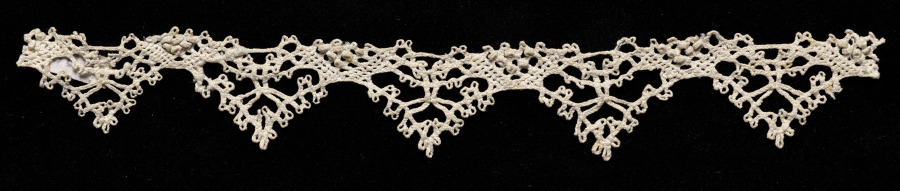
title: Lace Edging of Points (no selvage)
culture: Italy, Venice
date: 1540–60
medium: Bobbin lace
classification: Lace